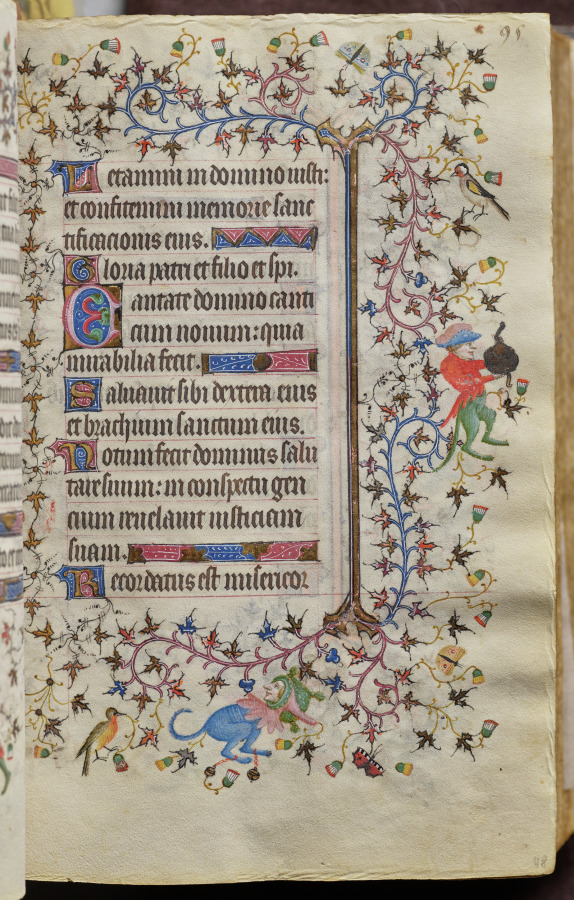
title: Hours of Charles the Noble, King of Navarre (1361-1425): fol. 48r, Text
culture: France, Paris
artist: Master of the Brussels Initials and Associates (French)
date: c. 1405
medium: ink, tempera, and gold on vellum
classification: Bound Volume